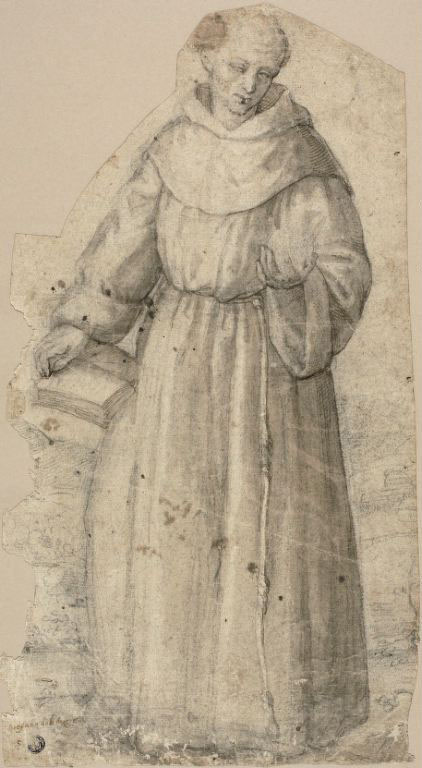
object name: Drawing and Watercolor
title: Saint Anthony of Padua (recto); Standing Monk (verso)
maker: Circle of Stefano dall'Arzere; Italian, c. 1515-1575/81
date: 1540/75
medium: Pen and brown ink with brush and brown wash, over black chalk (recto) and charcoal with traces of white chalk (verso) on gray laid paper, partially laid down on tan laid paper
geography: Italy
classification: drawings (visual works); prints and drawing